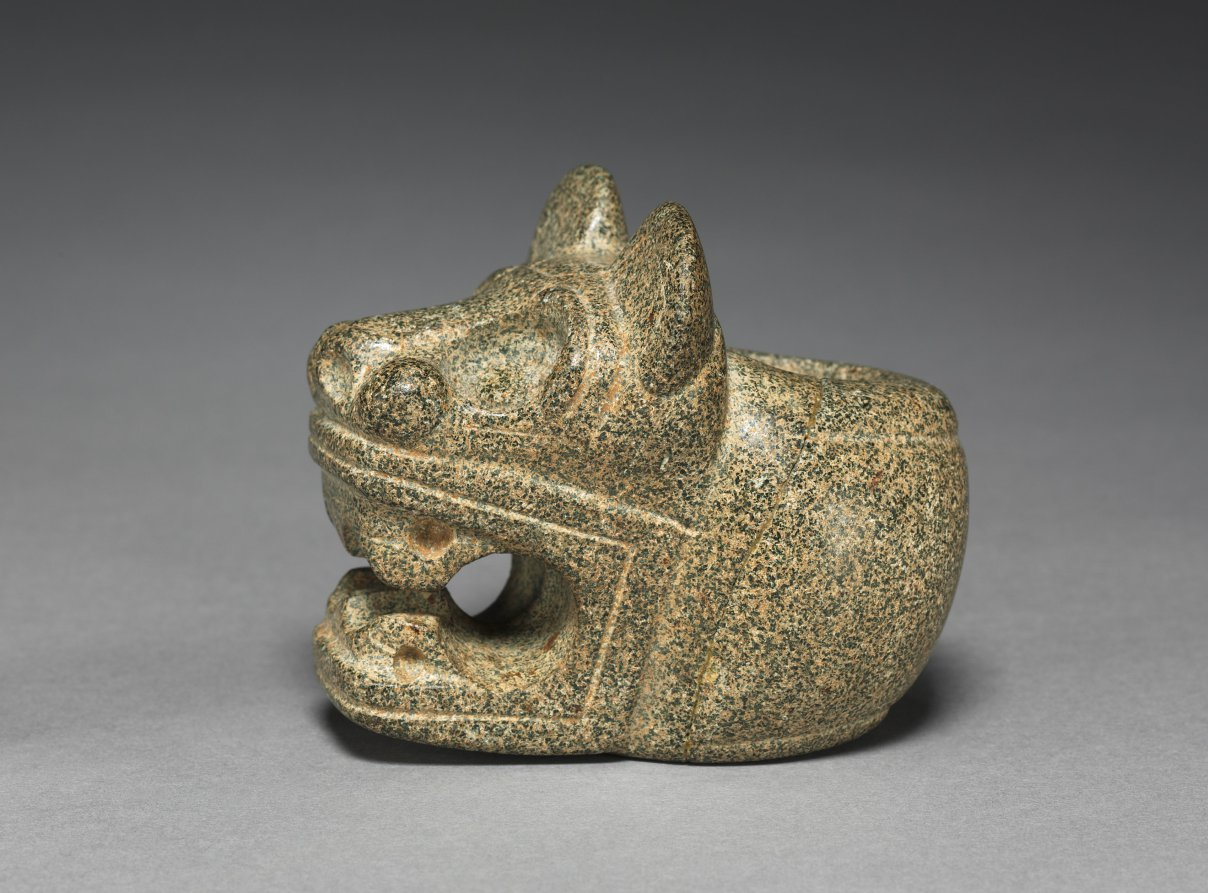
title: Ceremonial Mace (Club) Head: Feline (Jaguar?)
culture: Costa Rica, Southern Nicoya region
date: c. 300 BCE–600 CE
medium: stone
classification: Stone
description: Probably once mounted on wooden shafts, these objects could have served as symbols of chiefly authority, group insignia, the heads of ceremonial weapons, or all three. They eventually were placed in elite graves. The bird may be a male curassow and the feline, a jaguar.